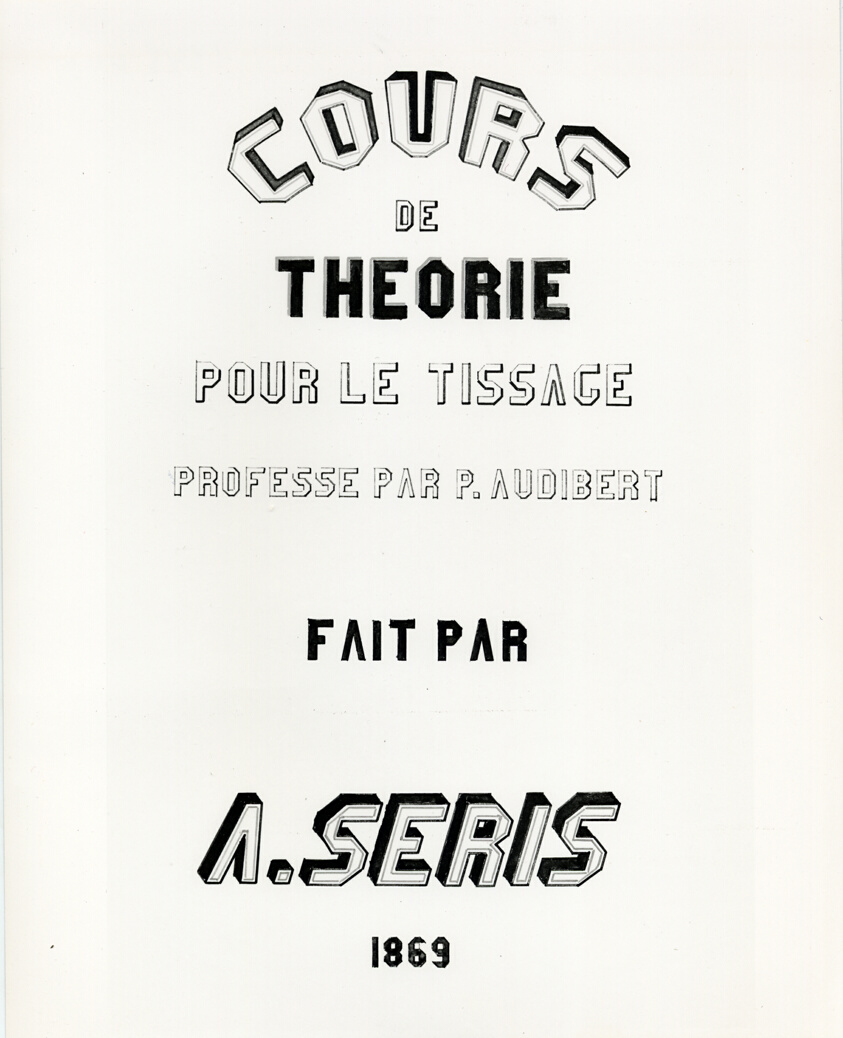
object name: Book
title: Cours de Théorie pour la Tissage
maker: P. Audibert (French, active c. 1869 ) and A. Seris (French, active c. 1869); France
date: 1869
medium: Weaver's notebook, handwritten in French, showing diagrams for weaving, swatches and drawings of looms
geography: France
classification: textile; book